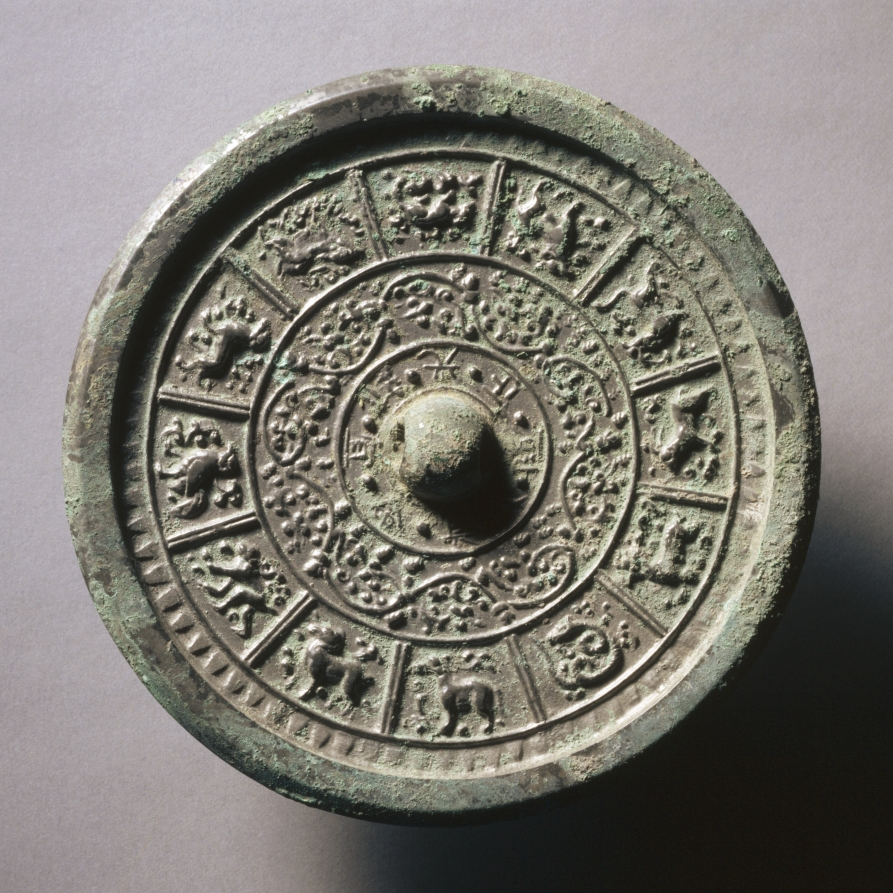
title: Mirror with Interlacing Floral Motifs and Twelve Zodiac Animals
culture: China, Sui dynasty (581-618)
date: late 500s–early 600s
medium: bronze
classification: Metalwork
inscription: 光正隨人，長命宜新。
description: The design of this mirror consists of a central knob and a series of concentric circular bands. The innermost band contains an eight-word inscription, with phrasing typical of earlier mirrors found in the Sui and early Tang periods: The mirror's light shows the man inside. May you live a long life and [constantly] renew yourself. Floral branches interlace in the second band. The controlled undulation produces five segments. The third band is divided into twelve parts, which house the zodiac animals in the clockwise sequence: rat, ox, tiger, hare, dragon, snake, horse, sheep, monkey, cock, dog, and boar. A sunken ring of the well-known sawtooth design continues to be effective, before the undecorated rim sets the final enclosure.